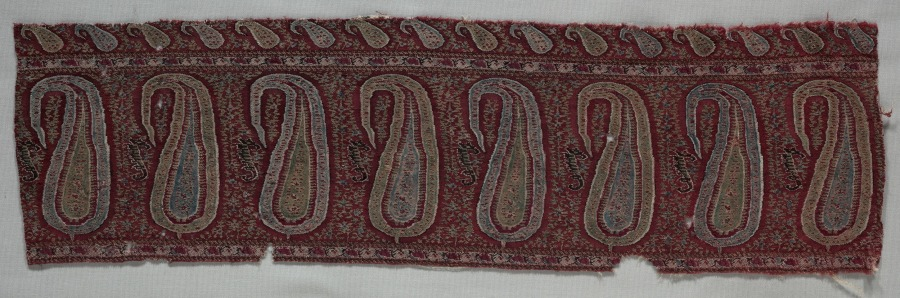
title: Border of a Shawl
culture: India, Punjab, 19th century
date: 1800s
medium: tapestry twill; wool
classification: Textile